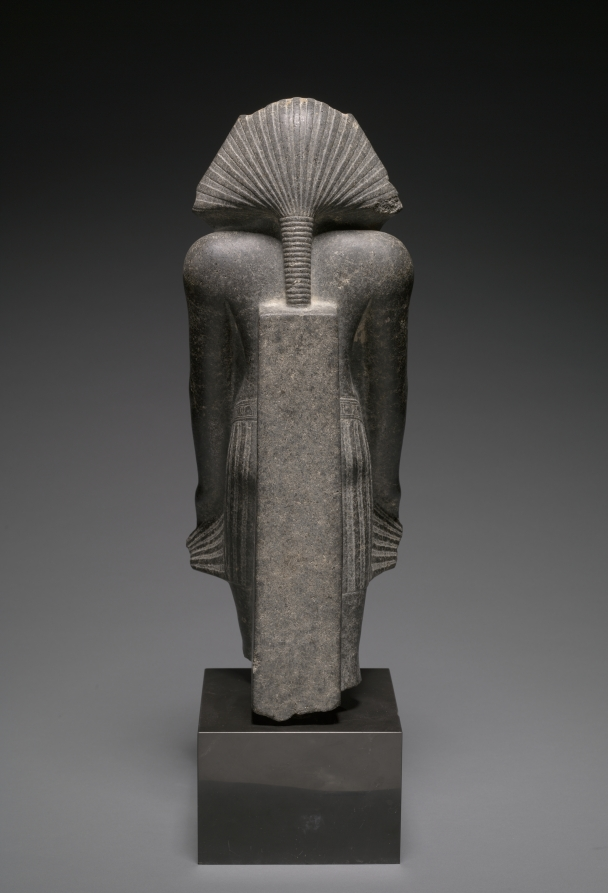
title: Statue of Amenemhat III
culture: Egypt, Middle Kingdom (2040–1648 BCE), Dynasty 12, reign of Amenemhat III (1860–1814 BCE)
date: c. 1859–1814 BCE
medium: granodiorite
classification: Sculpture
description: Even though this statue of a king is uninscribed, its distinctive features identify it without any doubt as a portrait of Amenemhat III. The heavy brows, prominent cheekbones, hollow cheeks, jutting lower jaw, and tightly bunched muscles at the corners of the mouth make a strikingly realistic impression. Not realistic, however, are the king’s supersized ears. Instead, they symbolize the ruler’s willingness to hear the prayers of his people. If this image had been carved in relief, the king’s hands would have been uplifted in worship. Here, however, to prevent the breakage of projecting limbs, the ruler’s hands are pressed flat against the front his kilt, a portion of which is looped over his belt.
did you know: The first pyramid Amenemhat III attempted to build, the so-called Black Pyramid, had major construction flaws and had to be abandoned when it started to collapse.